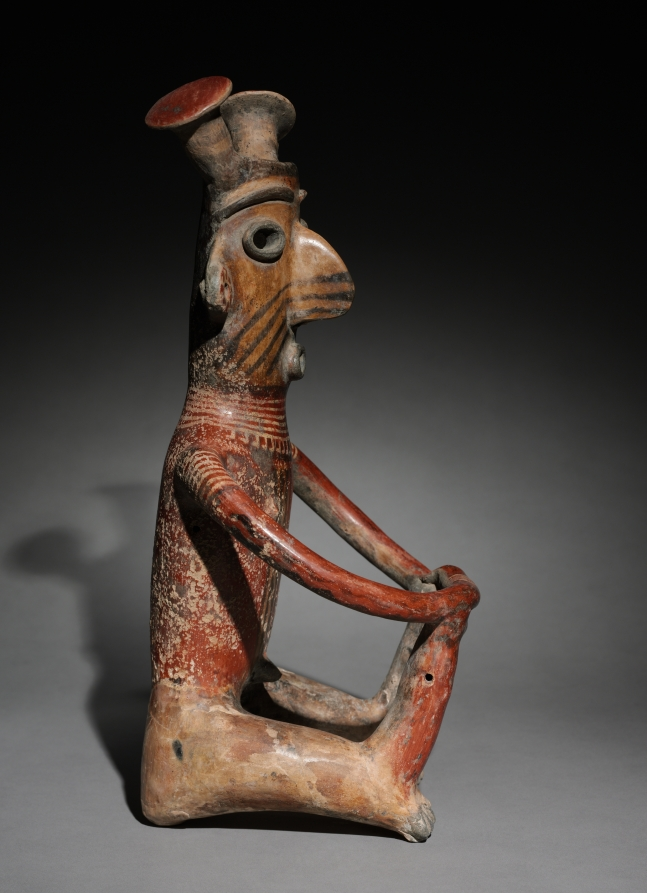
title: Seated Male Figure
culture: Mexico, Jalisco, Zacatecas Style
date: c. 200 CE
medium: earthenware with colored slips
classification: Sculpture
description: A female once accompanied this abstract male. The two may have had the same meaning as the nearby couple. They were also similarly linked by physical form, though the female’s head had no projections, the meaning of which is unknown. The size of the circle formed by the arms suggests that the figure once held something, perhaps a perishable offering.